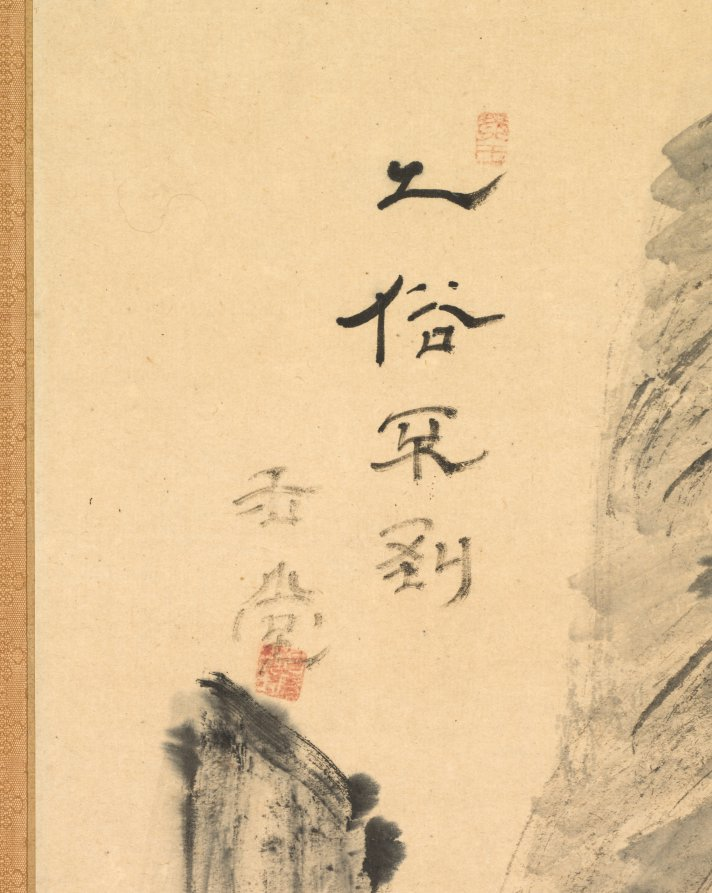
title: Forbidden to the Vulgar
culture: Japan, Edo period (1615–1868)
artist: Uragami Gyokudō (Japanese, 1745–1820)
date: late 1800s-early 1900s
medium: hanging scroll; ink on paper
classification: Painting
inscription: Inscriptions upper left are title and signature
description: Gyokudo painted in the Nanga style (literary men's school of painting), originally influenced by 18th-century Chinese painting. Most of his landscapes are variations on the theme of tall mountains and remote huts. Note the spontaneity of the brushstrokes and how the dry, rough ink works with the texture of the paper. Born to an ancient samurai family, Gyokudo was trained in the Chinese classics and studied painting, poetry, and the koto (kind of zither). He devoted himself to art and music, painting, drinking, and playing the koto as he wandered about the country.